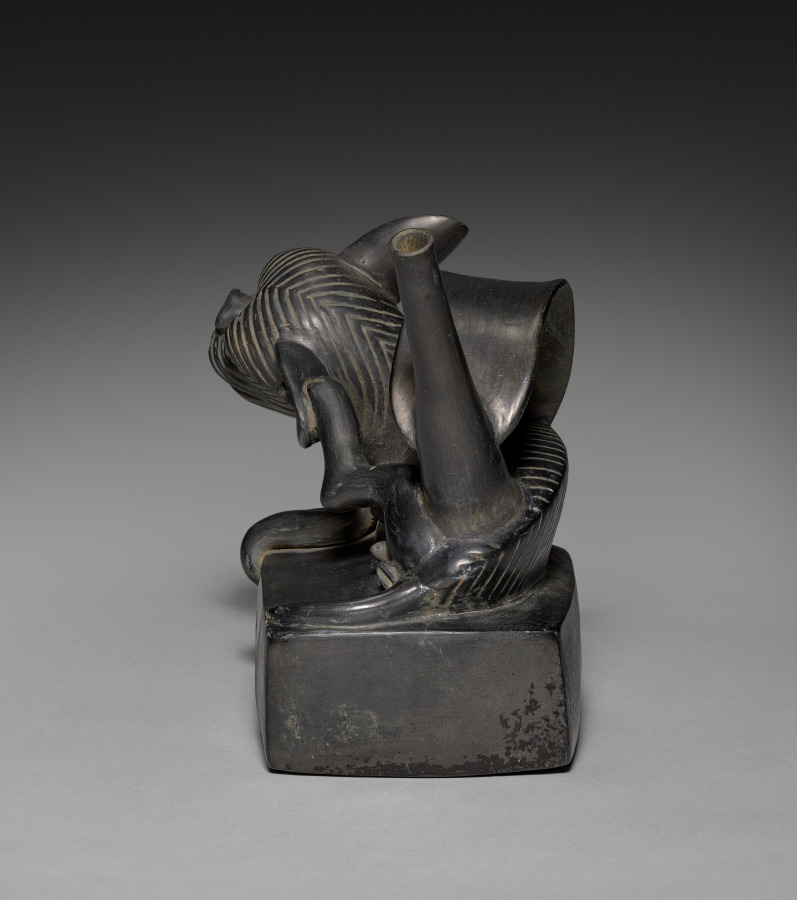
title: Vessel with Reclining Dog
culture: Central Andes, North Coast, Chimú-Inka style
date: 1470–1532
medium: ceramic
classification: Ceramic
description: This vessel represents a Peruvian hairless dog who has recently given birth and seems to be taking a break from maternal obligations. The meanings of such dogs may be connected to the trade networks that brought them to Peru from Mexico in the late pre-Hispanic period. Perhaps these foreign ties made them prestige animals whose breeding engendered further status for the owner.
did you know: This vessel represents a Peruvian hairless dog who has recently given birth.